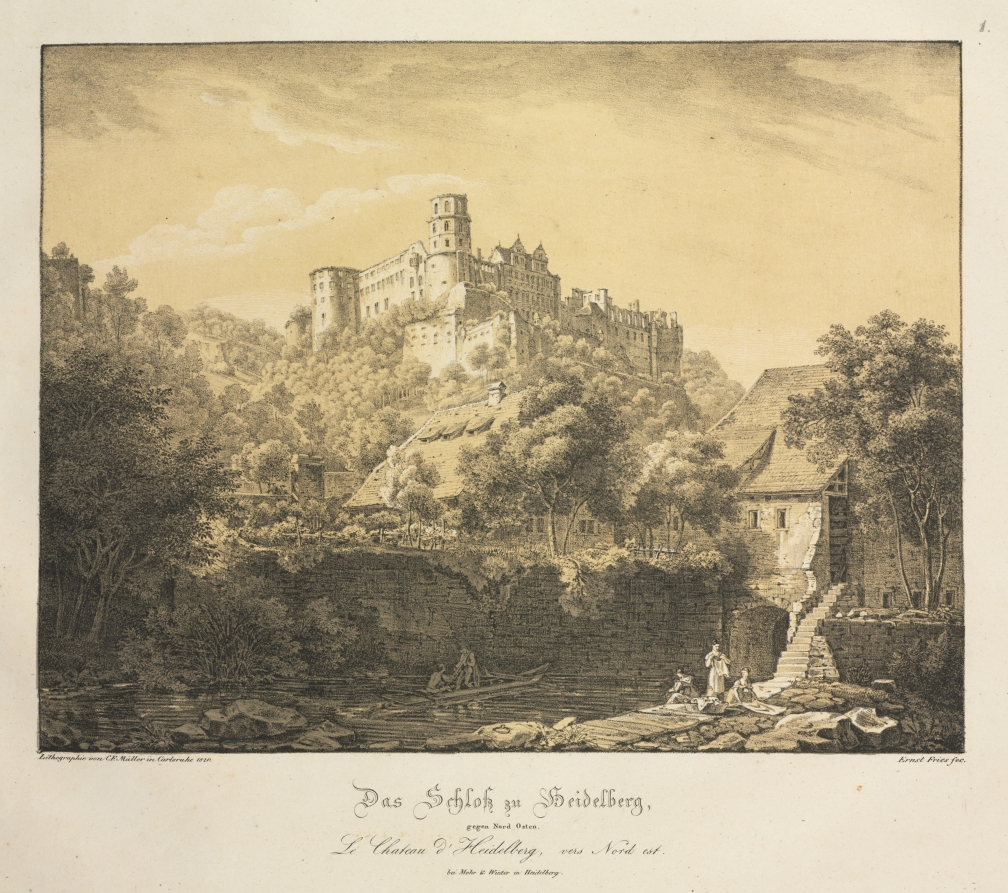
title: Six Views of Heidelberg Castle: Eastward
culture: Germany, 19th century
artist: Ernst Fries (German, 1801–1833)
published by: Mohr & Winter, Heidelberg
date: 1820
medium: lithograph printed in black with two tint stones: pale ochre overall and grey selectively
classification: Print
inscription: In print: Das Heidelberger Schloss gegen Osten Inscribed in graphite upper right corner: 2; lower right margin: Das Heidelberger Schloss gegen Osten